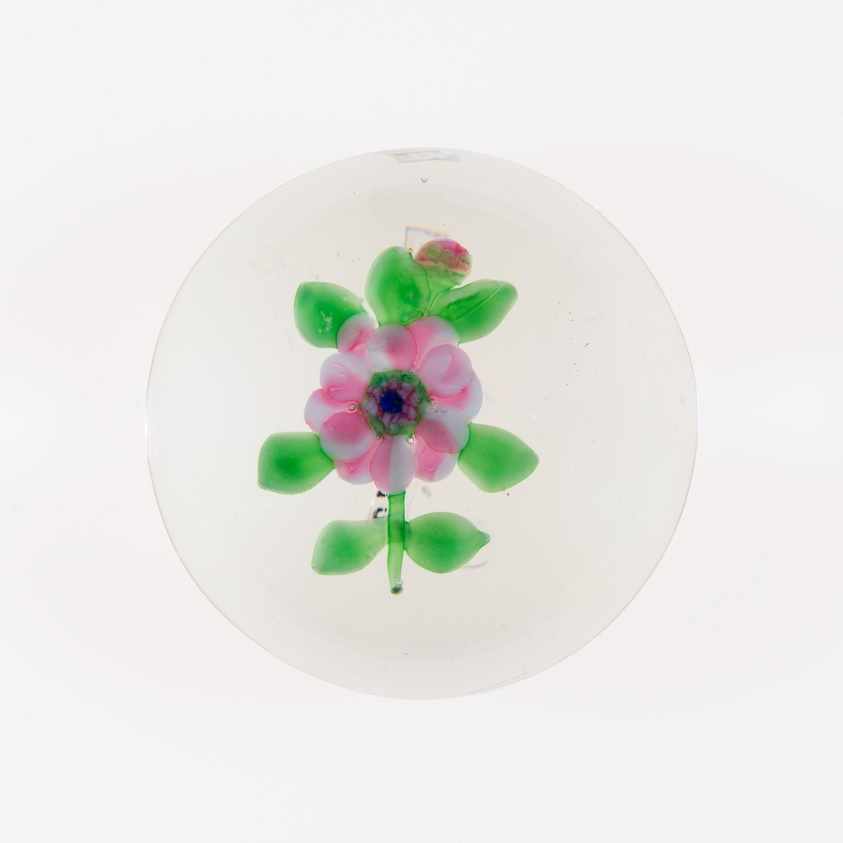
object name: Glass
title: Paperweight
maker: Clichy Glassworks (Cristalleries de Clichy); Clichy, France, 1837-1885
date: 19th century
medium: Glass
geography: France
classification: paperweight; glass